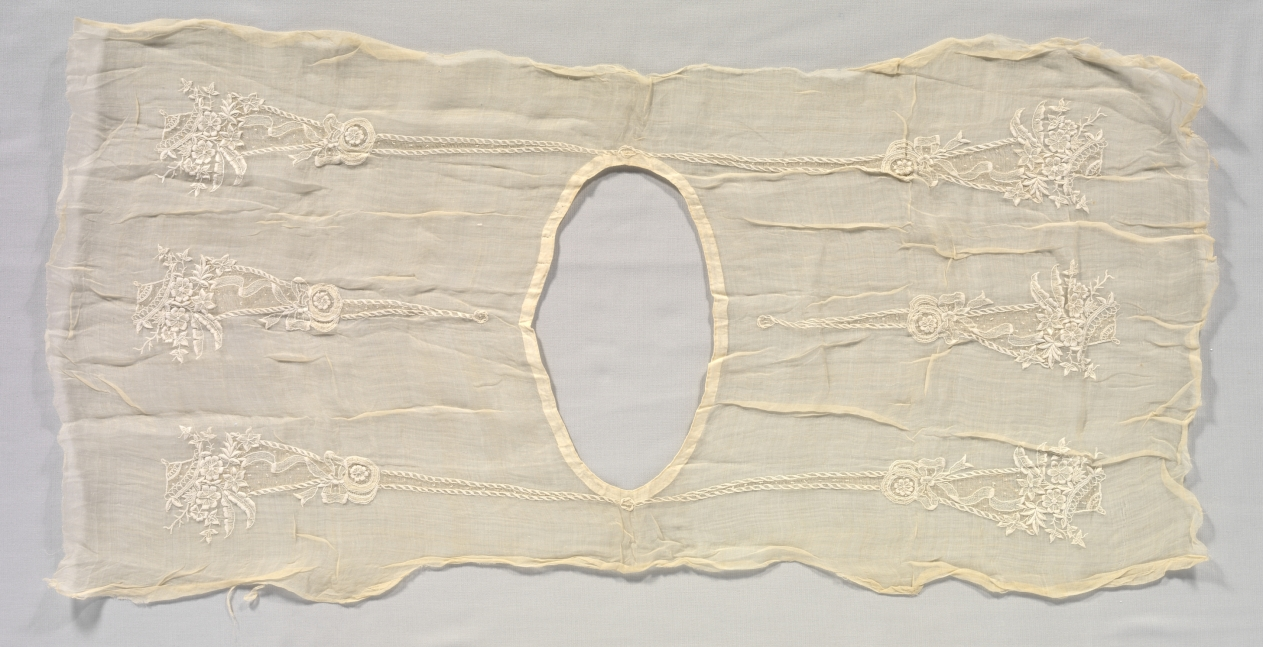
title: Blouse front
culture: Philippines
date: c. 1875–1900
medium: Plain weave piña: needle lace (drawnwork) and embroidery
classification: Embroidery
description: This blouse front is made of fine piña fiber in plain weave. The panel has an oval neck opening and is embroidered with repeated vertical floral motifs arranged in pairs on each side of the opening. The edges are unfinished, indicating that it was intended to be sewn into a complete baro-camisa garment.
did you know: Piña is made from fibers of the pineapple plant, first introduced to the Philippines by the Spanish in the sixteenth century.